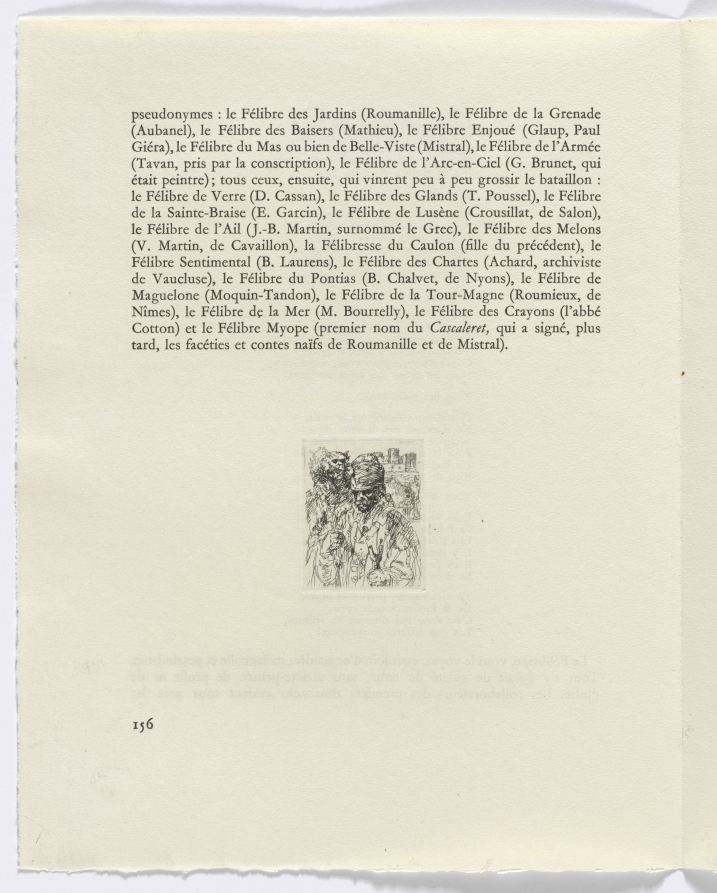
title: Frédéric Mistral: Mémoires et Recits by Frédéric Mistral: old man (page 156)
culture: France, 20th century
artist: Auguste Brouet (French, 1872–1941)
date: 1937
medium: etchings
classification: Portfolio